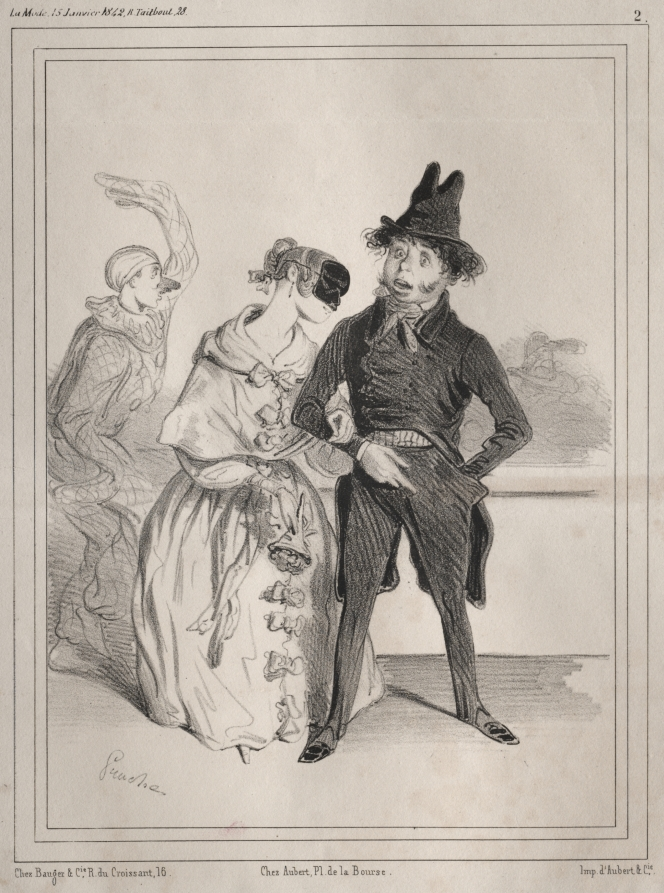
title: Pochades de carnaval: C'est singulier! elle me dit que je suis Philibert Désormeaux, et que je passe pour un imbecile!! ....où diable à-t-elle sù cela?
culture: France, 19th century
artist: Clémente Pruche (French, 1831–1870)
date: 1842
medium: lithograph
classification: Print